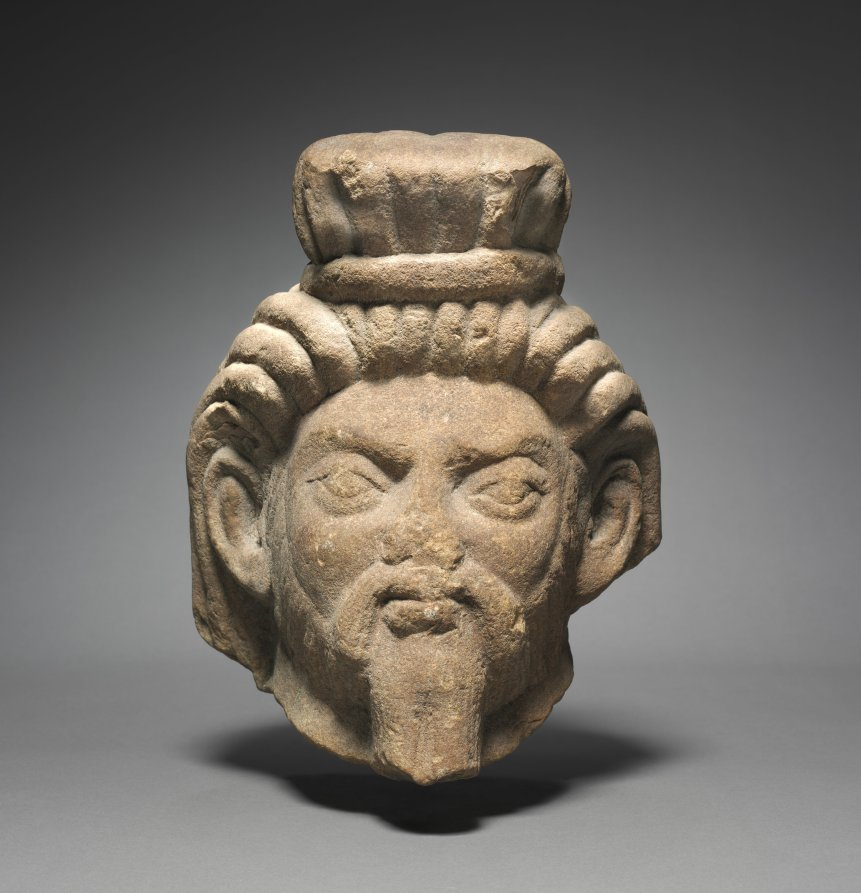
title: Head of a Rishi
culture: Northern India, Mathura, Kushan period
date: c. 125–150 CE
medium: stone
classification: Sculpture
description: The beard and thick dreadlocks identify this image as that of a rishi, a wise sage and Brahmin priest of Hinduism. Few examples of rishis survive in the round from this period.